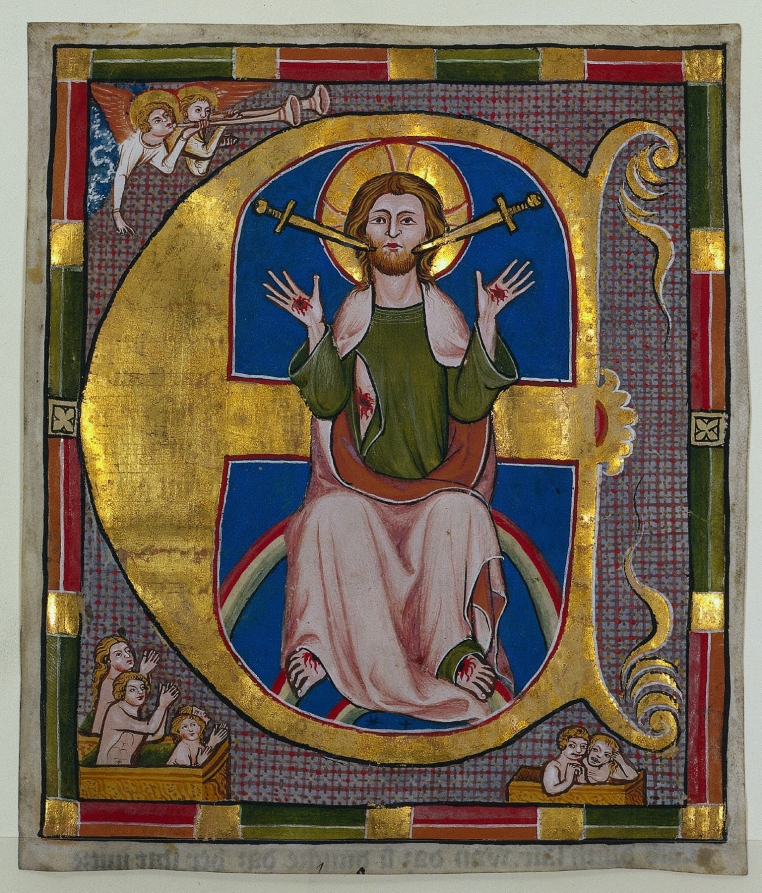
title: Initial E from a Municipal Law Book: The Last Judgment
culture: Germany, Regensburg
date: c. 1330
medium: ink, tempera, and gold on parchment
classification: Manuscript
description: This initial E serves as a frame for the figure of Christ, shown here as the judge of the world with the swords of justice emanating from his mouth. Above, two angels emerge from the heavenly realm to announce the final judgment of humankind, while below, the dead rise from their graves. The image provides a visual message of justice, retribution, and accountability, and shows the connection between secular and religious themes during the Middle Ages. Regensburg on the Danube, one of the most important cities in southern Germany in the Middle Ages, was also affected by the plague, although little is known about it from written sources.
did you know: Christ sits on a tricolored rainbow, the three colors symbolize the Trinity: the father, the son (Jesus Christ), and the holy spirit.